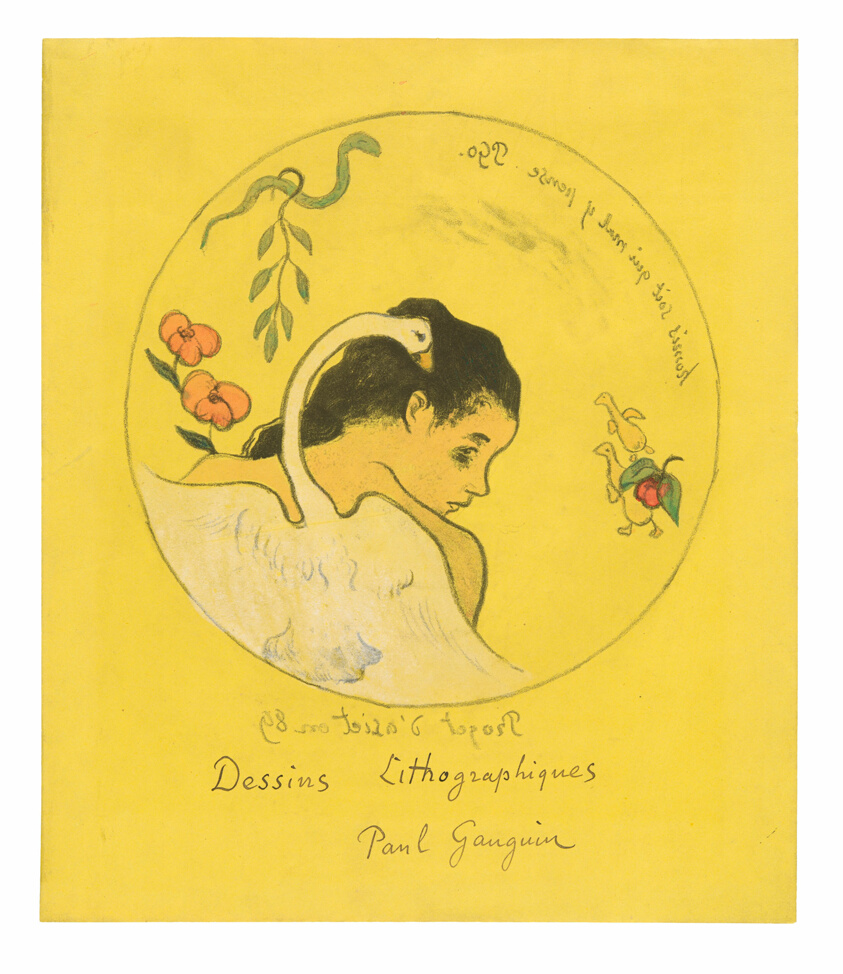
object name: Print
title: Projet d’assiette (Leda) (Design for a Plate [Leda]), frontispiece from the Volpini Suite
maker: Paul Gauguin (French, 1848-1903)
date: 1889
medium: Zincograph in black, with pale orange, red and green watercolor and white crayon, on chrome yellow wove paper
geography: France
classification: zincograph; lithograph; print; prints and drawing